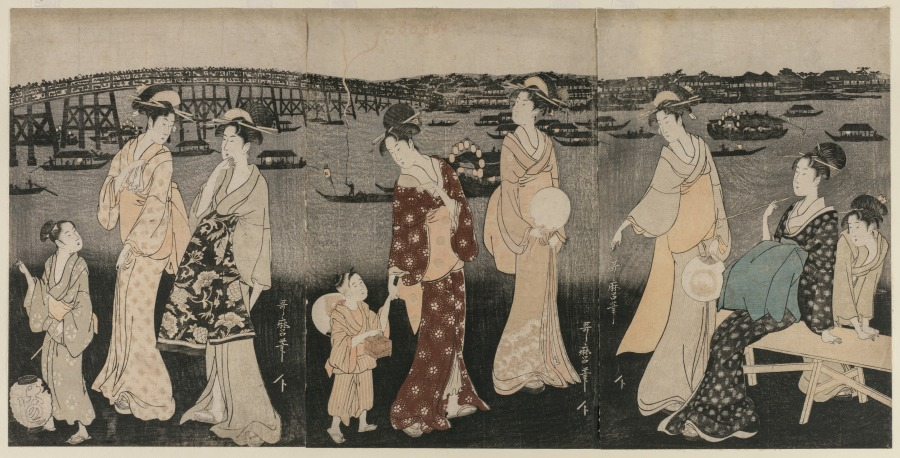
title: Enjoying the Evening Cool Along the Sumida River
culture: Japan, Edo period (1615–1868)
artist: Kitagawa Utamaro (Japanese, c. 1754–1806)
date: c. 1797–98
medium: Triptych of woodblock prints; ink and color on paper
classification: Print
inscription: Artist's signature: Utamaro hitsu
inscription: Publisher: Yamguachiya Chūsuke (emblem)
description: People crowding the Ryōgoku Bridge over the Sumida River and those aboard party boats below enjoy summer fireworks. Among a group gathered on the riverbank a little boy stands holding his caged pet cricket in one hand, and a young woman’s hand in the other. At left, a boy with a lantern advertising the name of the restaurant for which he works, “Ōnoshi,” guides two women away.